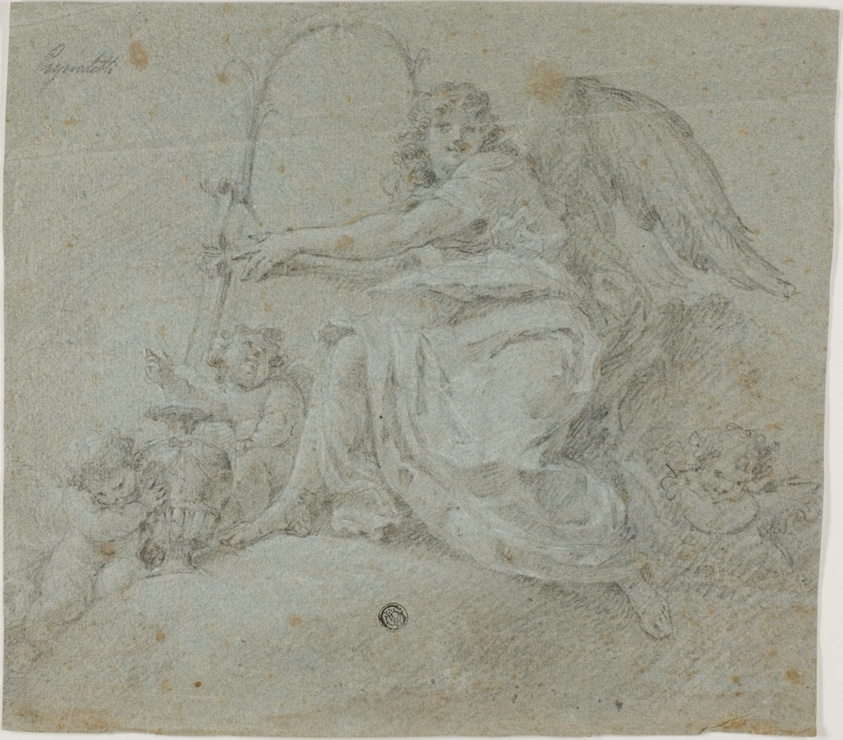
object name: Drawing and Watercolor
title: Angel with Lyre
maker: Attributed to Moncayo Pignatelly (Spanish, c. 1700-1770); or style of Fidele Fischetti (Italian, 1734-1789)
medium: Black chalk heightened with white chalk, on blue gray laid paper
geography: Spain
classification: graphite; drawings (visual works); prints and drawing